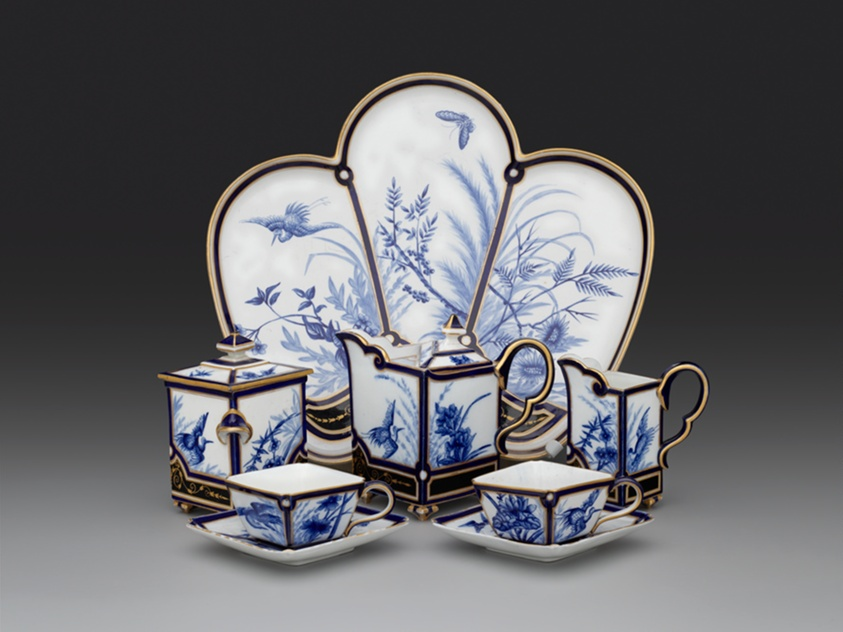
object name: Ceramics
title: Tea Service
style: Japanism, 19th century, Aesthetic Movement, Aestheticism, english, japonism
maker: Worcester Porcelain Factory (Worcester, England, founded 1751)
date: 1877 and 1878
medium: Bone china, enamel, and gilding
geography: England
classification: ceramics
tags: tea, tea service